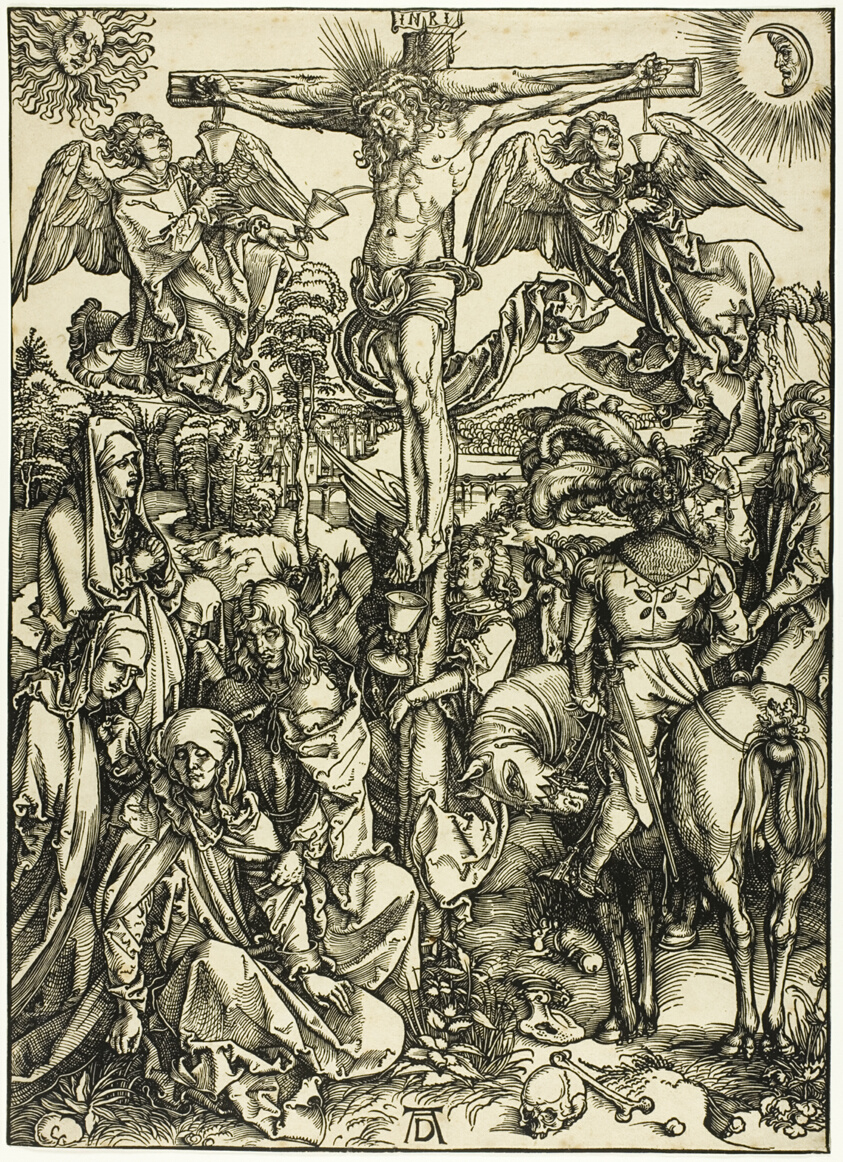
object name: Print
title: The Crucifixion, from The Large Passion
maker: Albrecht Dürer (German, 1471-1528)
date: 1498, published 1511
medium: Woodcut in black on ivory laid paper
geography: Germany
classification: woodcut; print; prints and drawing; paper